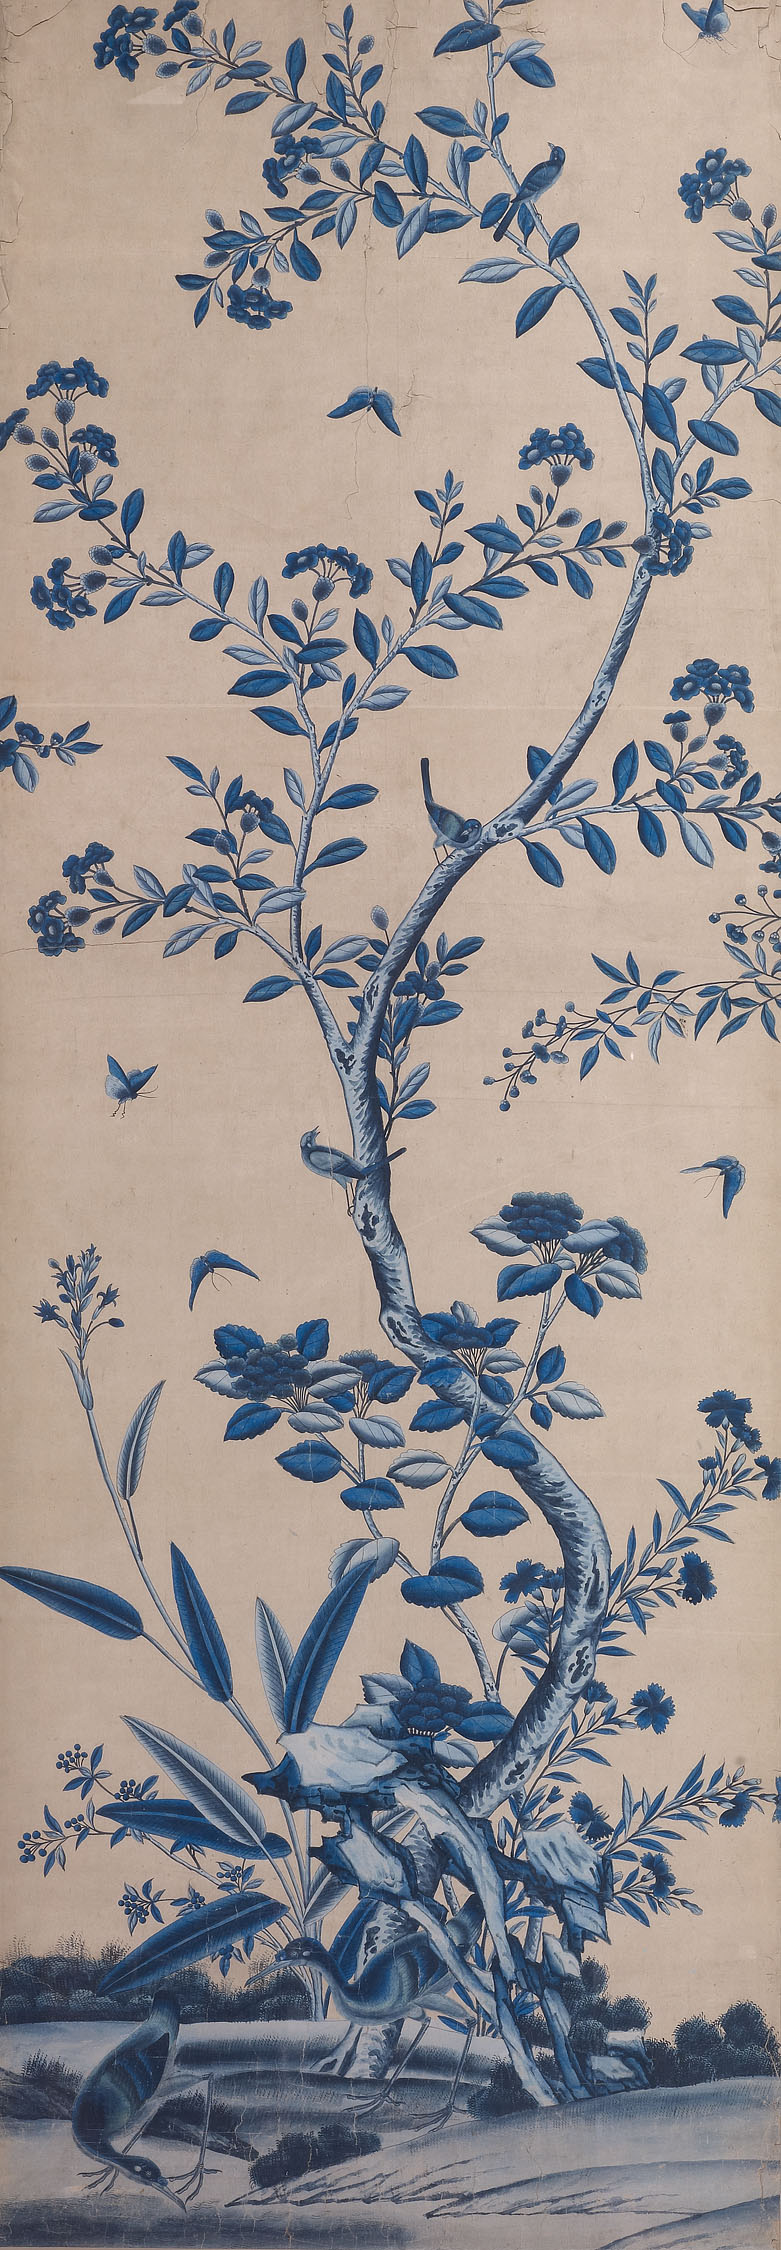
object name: Coverings and Hangings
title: Wallpaper Panel with Birds and Flowering Trees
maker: China, for the European market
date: Late 18th/early 19th century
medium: Hand-painted paper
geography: China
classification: wallpaper; paper; european decorative arts